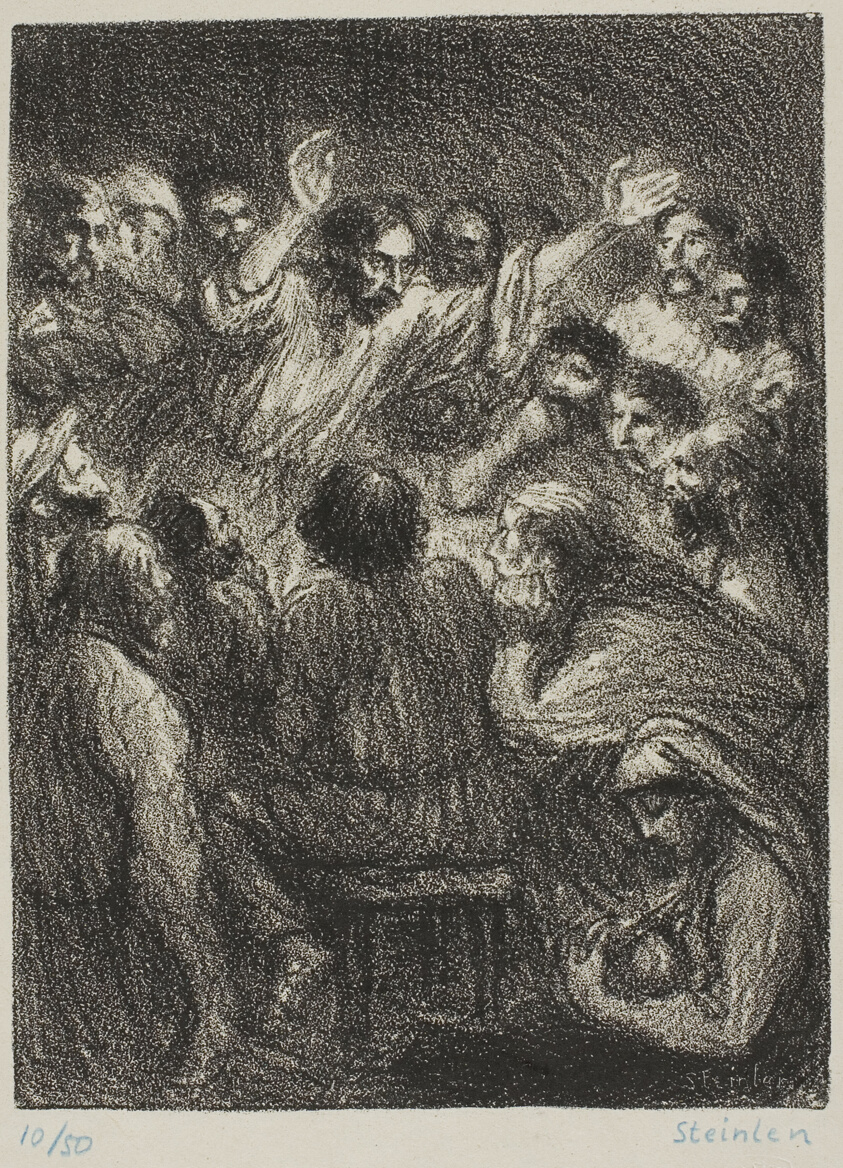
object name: Print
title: The Apostle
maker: Théophile-Alexandre Steinlen; French, born Switzerland, 1859-1923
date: 1908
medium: Lithograph in black on grayish-ivory wove chine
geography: France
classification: lithograph; print; prints and drawing